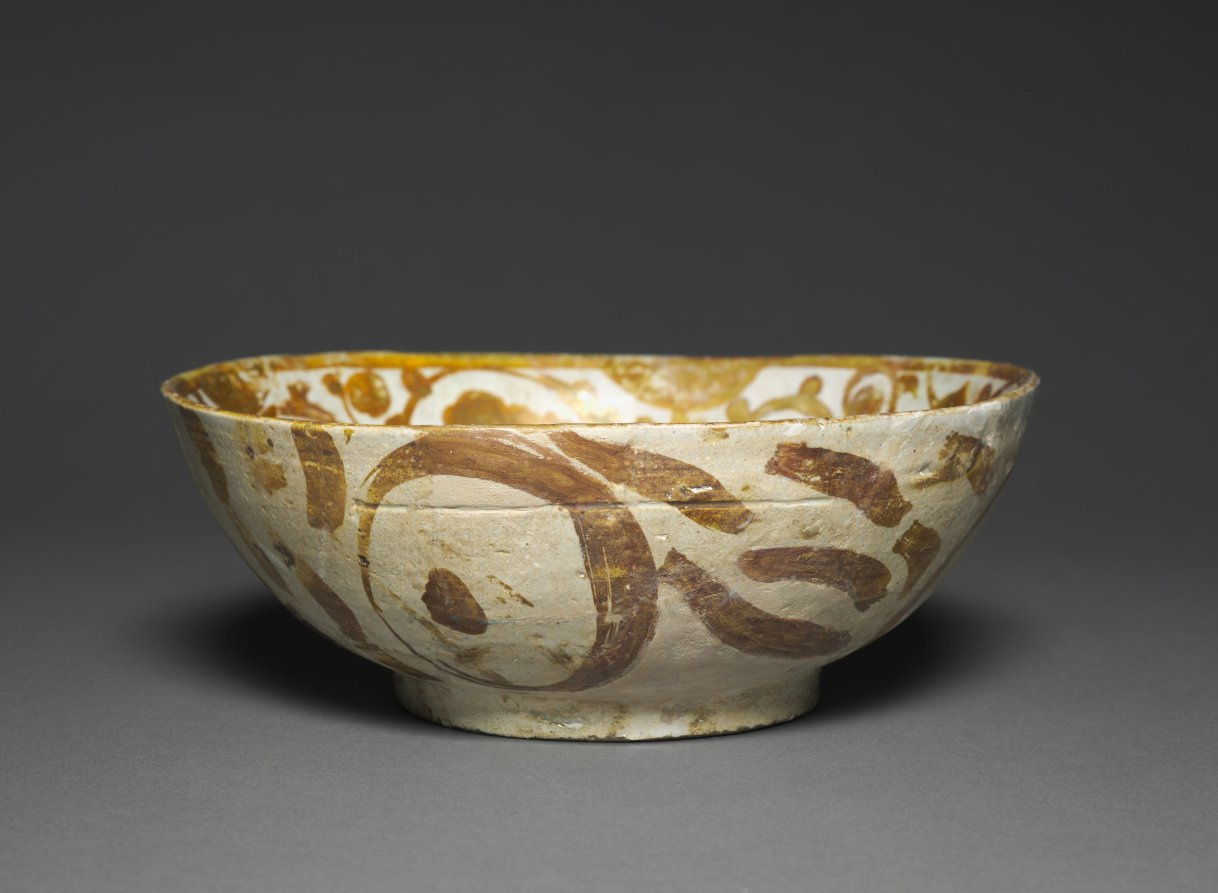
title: Luster Bowl with Ibex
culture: Egypt, Fustat (Old Cairo), Fatimid period (909–1171)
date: 1000s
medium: earthenware with luster-painted design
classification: Ceramic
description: The expensive and unpredictable luster technique was transmitted by Iraqi potters to the more prosperous Fatimid court in Cairo where it flourished from around 1000 until about 1171.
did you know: Lusterware seems to have been a secret process, confined to a small number of craftsmen.